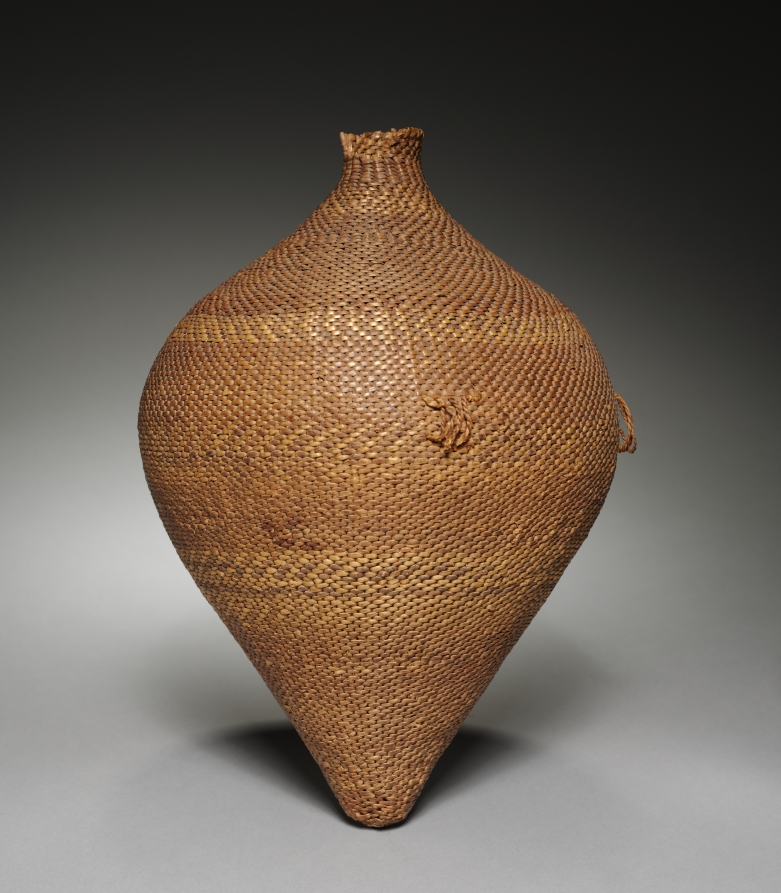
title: Seed Storage Jar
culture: Great Basin, Paiute, Kern County, Unassigned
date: Unassigned, before 1917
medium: peeled and unpeeled willow, diagonal twine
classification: Basketry